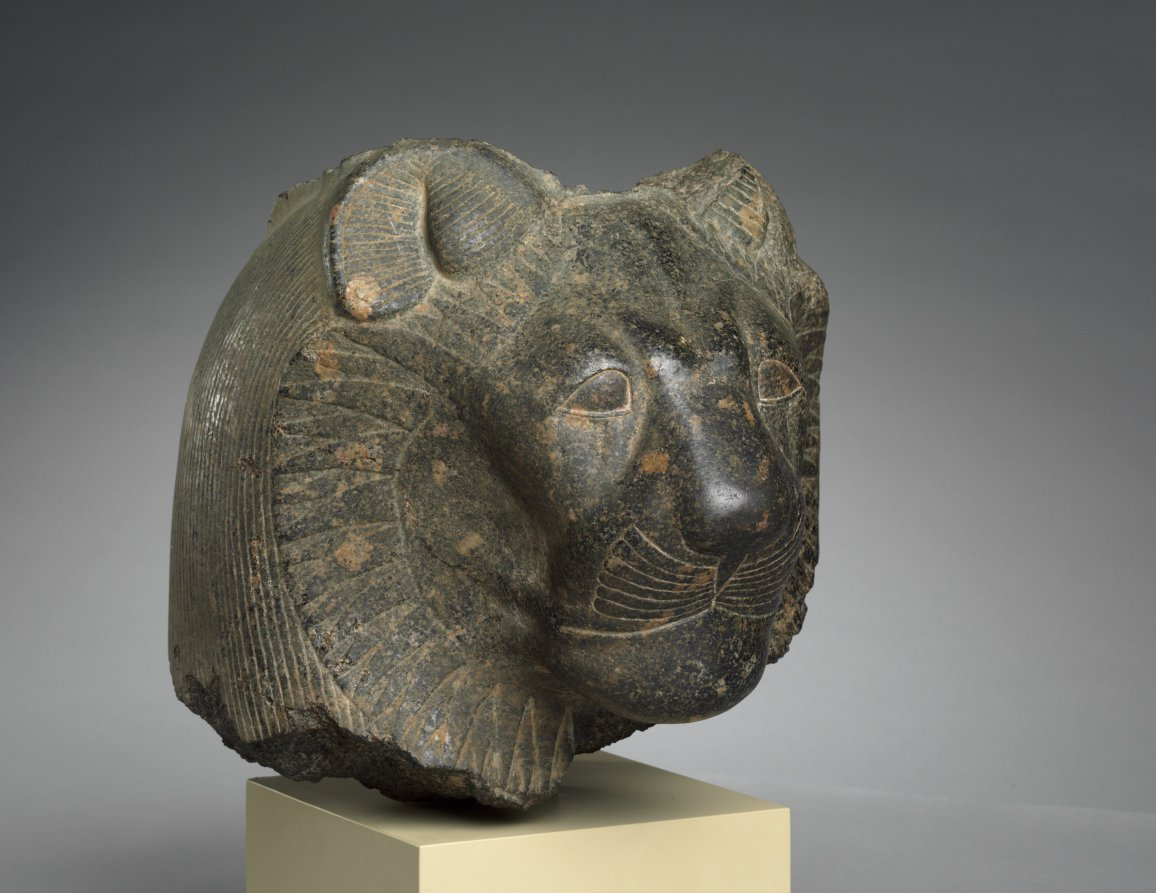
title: Head of Sekhmet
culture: Egypt, Thebes(?), New Kingdom (1540–1069 BCE), Dynasty 18, reign of Amenhotep III (1390–1352 BCE)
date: c. 1391–1353 BCE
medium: granodiorite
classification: Sculpture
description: This lioness head once belonged to a grand statue of the goddess Sekhmet, "the powerful one," probably seated and wearing a tight dress. Possibly appealing to her healing aspect, Pharaoh Amenhotep III, often described as “beloved of Sekhmet,” commissioned and dedicated hundreds of large granodiorite Sekhmet sculptures in his Theban mortuary temple. Thus, this head likely comes from Thebes, perhaps later moved across the Nile—like many such sculptures—to the temple of Mut, a related deity, at Karnak. Behind her stylized ruff, Sekhmet wears a wig, once crowned with a sun disk and uraeus, the stylized cobra symbolizing royal or divine power.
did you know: Amenhotep III may have dedicated 730 statues of Sekhmet, two for each day of the year.